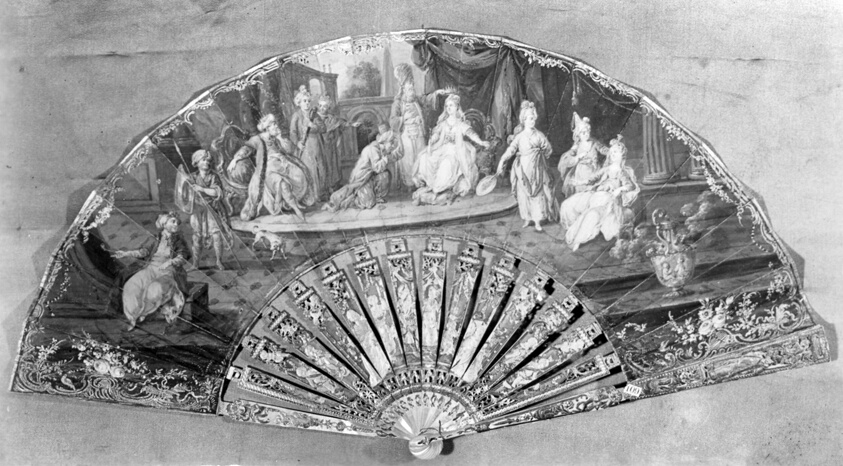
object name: Costume and Accessories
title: Fan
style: louis xv, european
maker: France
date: 18th century, Louis XV period, 1774–1793)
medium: Carved pearl sticks; encrusted with gold painted swanskin paper mount; rhinestone rivet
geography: France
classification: textile; fan - paper; costume accessory - folding fan; costume